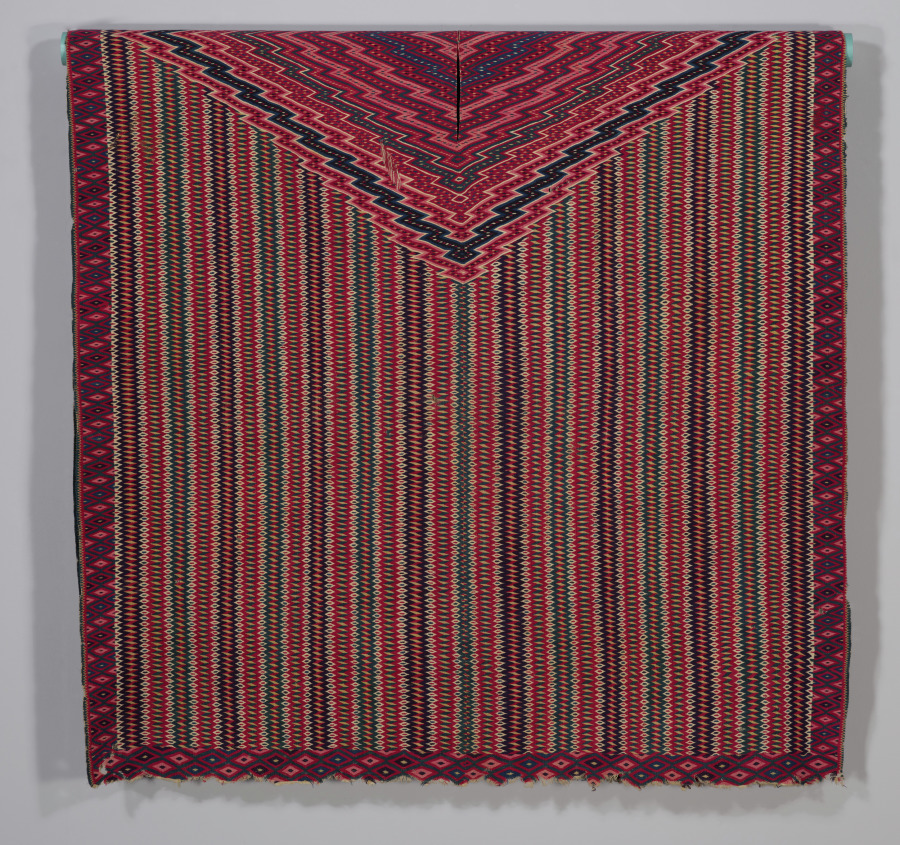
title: Saltillo Sarape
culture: Mexico, Coahuila state, Saltillo Region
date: c. 1820–50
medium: Wool, cotton; tapestry weave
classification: Textile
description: The sarape (wearing blanket) is a classic Mexican men’s garment that became a symbol of national identity and pride after Mexico achieved independence from Spain in 1821. Examples woven between about 1750 and 1875 in Saltillo, a town in northern Mexico, are the sarape’s most famous representatives, prized for their design, color, and technical refinement.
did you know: Saltillo sarapes (wearing blankets) are prized for their design, color, and technical refinement.